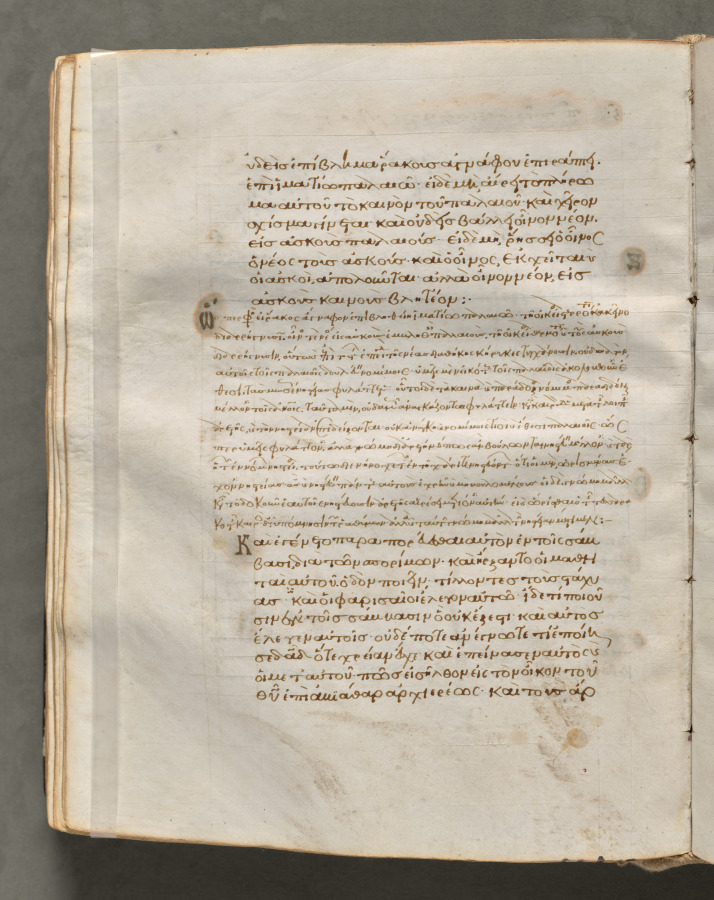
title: Text, folio 139 (verso), from a Gospel Book with Commentaries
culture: Byzantium, Constantinople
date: c. 1000–1100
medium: ink, tempera, and gold on vellum; leather binding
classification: Bound Volume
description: Each of the four gospels in this book opens on a page with brilliantly illuminated borders depicting the author of the text as well as birds-principally peacocks, symbols of the immortality of the soul-and fountains, representing the fountain of life and the salvation of the soul. This volume consists of 428 leaves with texts in Greek. Its level of sophistication suggests that it was probably written and decorated in a monastery in Constantinople.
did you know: Gospel Books were carried in procession through Byzantine churches.